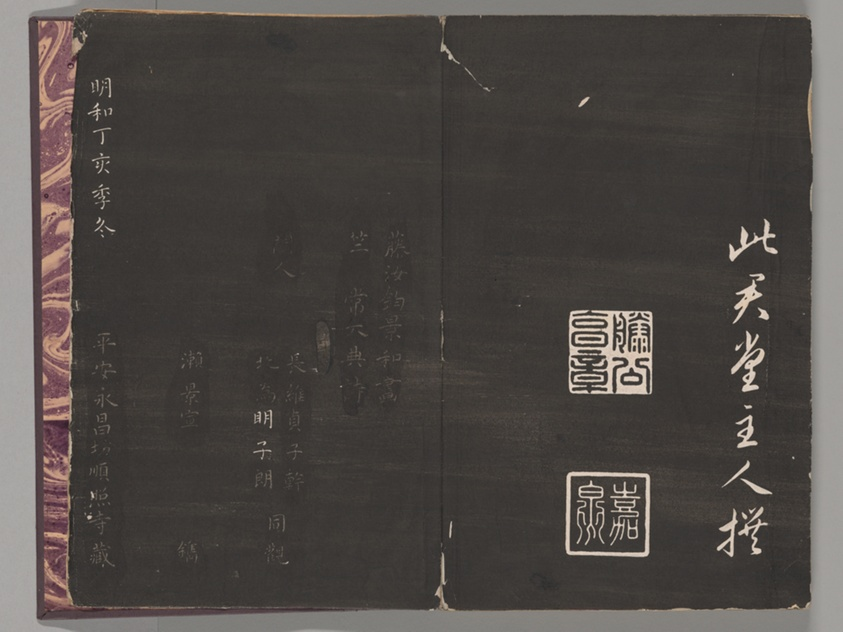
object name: Book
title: Soken sekisatsu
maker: Ito Jakuchu (Japanese, 1716-1800)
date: 1767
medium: Woodblock printed book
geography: Japan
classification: book